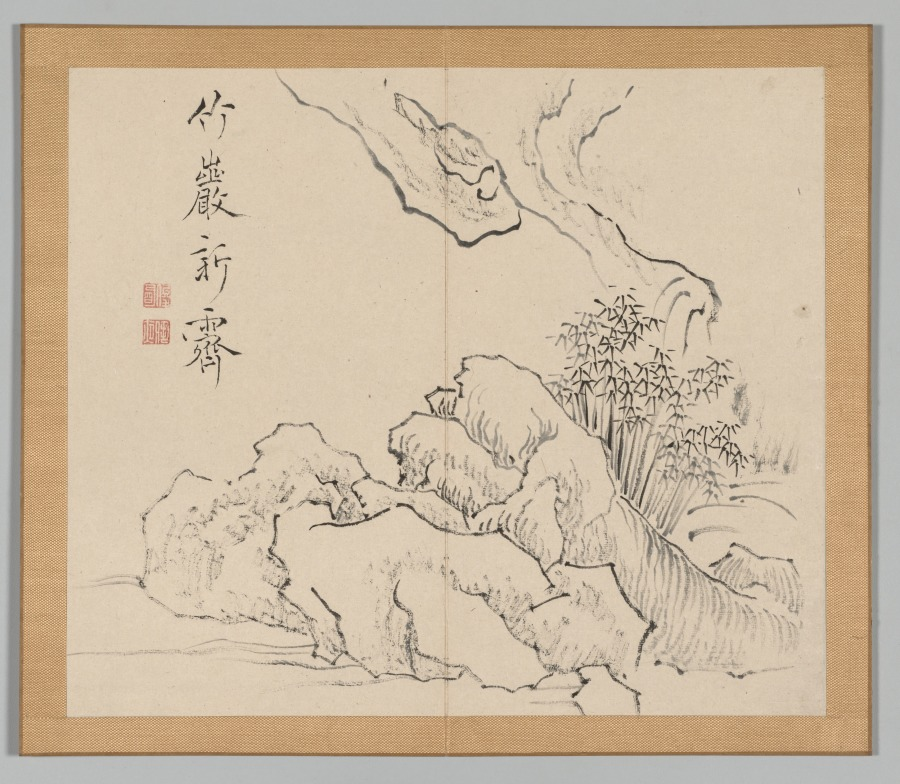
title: Reverberations of Taiga, Volume 2 (leaf 19)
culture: Japan, Edo period (1615–1868)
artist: Aoki Shukuya (Japanese, d. 1802)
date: mid- to late 1700s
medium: double-leaf from a pair of albums; ink and light color on paper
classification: Portfolio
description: Traditionally, young painters in Japan began their studies with an established master-painter. The master's compositions invariably became models that the apprentice copied to learn various ink and brush techniques. Shukuya was a pupil of the famous Kyoto artist Ikeno Taiga, whose style is reflected in these sketches of rocks, trees, and mountains.